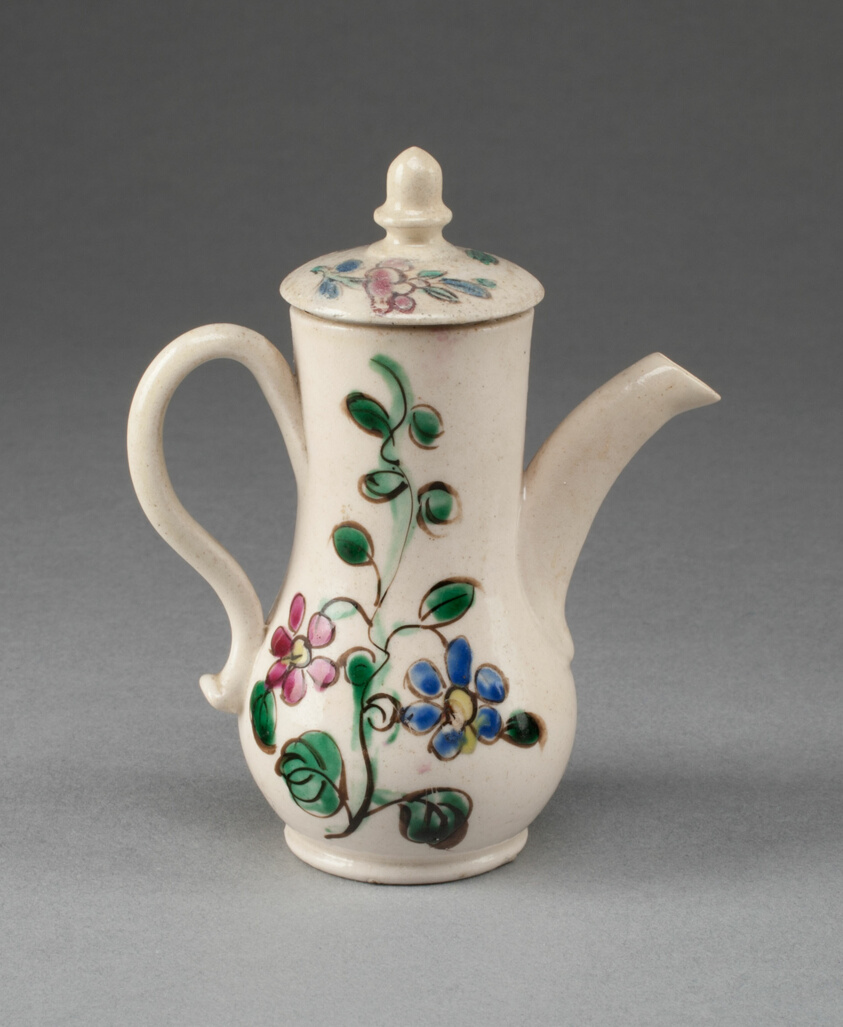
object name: Ceramics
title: Miniature Coffee Pot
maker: Staffordshire, England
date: c. 1760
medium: Salt-glazed stoneware, polychrome enamels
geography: Staffordshire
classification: salt-glazed stoneware; european decorative arts; ceramics; stoneware